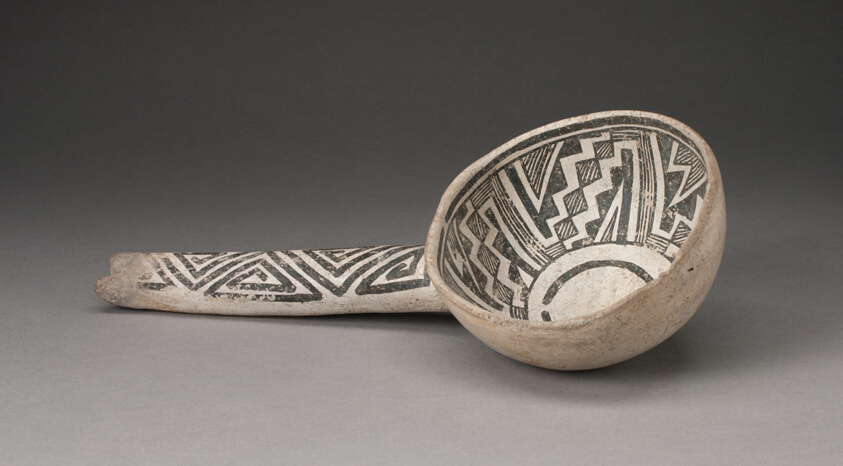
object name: Vessel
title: Dipper or Ladle with Interlocking Zigzag and Step-Fret Designs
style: ancestral pueblo (anasazi), anasazi, Pre-Columbian, americas, southwest, pueblo, Arts of the Americas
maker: Ancestral Pueblo (Anasazi), Black-on-white; West-central New Mexico, United States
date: 1000–1300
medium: Ceramic and pigment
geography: New Mexico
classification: earthenware; ceramics; utensil; art of the americas; vessel